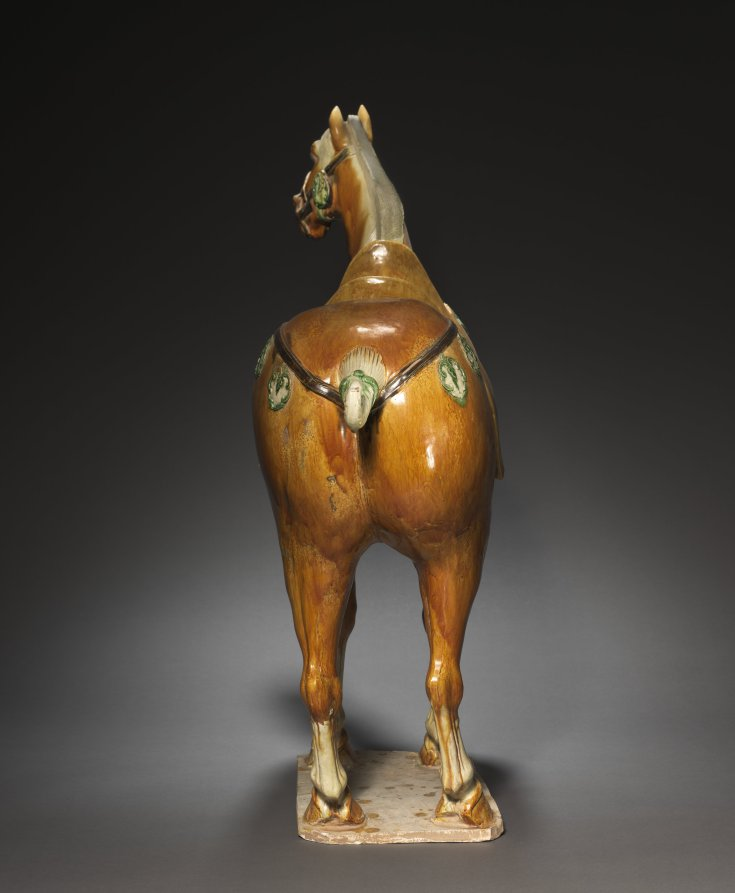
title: Horse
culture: China, probably Henan province, Tang dynasty (618–907)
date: late 600s–800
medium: glazed earthenware, sancai (three-color) ware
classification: Sculpture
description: This ceramic horse was part of a set of figures depicting a procession, all of which was included in the tomb of a person of high rank. In ancient China tombs were equipped with all the items it was thought to be needed in the afterlife—including horses, as an essential mode of transportation.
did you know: Sancai (three-color) glazes in green, amber, and transparent white show the high social status of the tomb’s occupant.